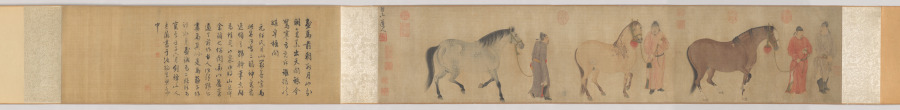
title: Three Horses and Four Grooms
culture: China, Yuan dynasty (1271-1368)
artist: Ren Renfa (Chinese, 1254–1328)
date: c. 1320s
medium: handscroll, ink and color on silk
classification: Painting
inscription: 月山道人. [印] 任氏子明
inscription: 1 colophon and 16 additional seals: 1 poem, 1 colophon dated 1552 or 1612, and 3 seals of Wang Yiying 王一瀛 (1500s); 2 seals of Liang Qingbiao 梁清標 (1620-1691); 6 seals of the Qianlong 乾隆 Emperor (r. 1736-95); 3 seals of the Jiaqing 嘉慶 Emperor (r. 1796-1821); 1 seal of the Xuantong 宣統 Emperor (r. 1908-12); 1 seal of Yu Xiezhong 余協中 (1900s).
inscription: Poem and colophon by Wang Yiying 王一瀛 (1500s): As for painters of horses in the previous dynasty, Surely the name of Yueshan [Ren Renfa] must come first. Under his brush and on his silk, They seem to have just galloped out from the imperial stud. Now as the world overflows with inferiority, Who, from the stable, can recognize a dragon-horse amidst mediocrity. Ren Yueshan [Ren Renfa] of the Yuan Dynasty was best in horse paintings. The three fine steeds he painted in this scroll are so dashing, so vigorous in spirit that they have indeed grasped some of the "brush-idea" of Han Gan. Not long ago this painting came into the possession of Mr. Gui Shanquan, who asked for my inscription. And I, while reading the old manuscripts of Hengshan [Wen Zhengming, 1470-1559], by accident, came cross the poem quoted above. As the ancients said "in painting horses, Master Han was [inspired by and produced] real horses; in composing poems, Master Su [Su Dongpo, the leading Song poet] wrote as if a painting were before him." These are truly what should be considered the two excellences; indeed, they are to be treasured. In the sixth month of the renzi year [either 1552 or 1612]. Jian feng shan ren [The Mountain Dweller of the Sword Peak], Wang Yiying, written in the Qu si ting Pavilion at Chiyang.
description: Ren Renfa's horse images are elegant in appearance and vigorous in spirit. His work attracted not only Chinese scholars but also the Mongols at the imperial court. Inspired by the contemporary scholarly interest in restoring a sense of antiquity in art—an artistic direction led by Zhao Mengfu that exerted a great impact in the Yuan art scene—Ren Renfa, like Zhao Mengfu, modeled his depictions of horses after the Song master Li Gonglin. Another key style component that Ren introduced to this genre was a revival of the Tang classical tradition. The refined color treatment of the horses as seen here was derived from the Tang master Han Gan.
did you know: Only the elegant first horse with a white blaze is accompanied by two grooms, as if its lightning speed required extra supervision.